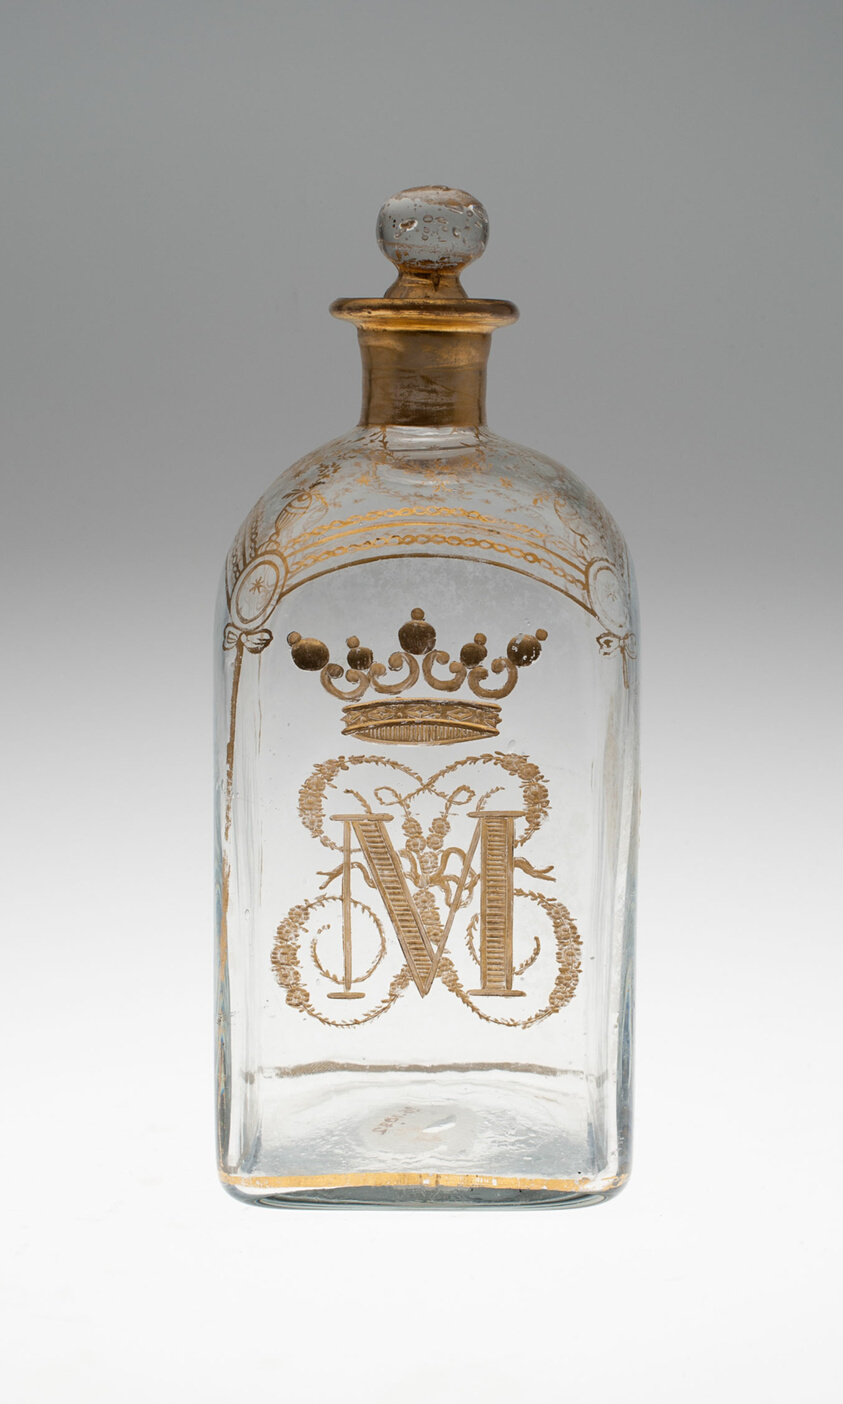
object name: Glass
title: Bottle with Stopper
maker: Spain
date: c. 1771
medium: Glass with gilt decoration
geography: Spain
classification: glass; european decorative arts